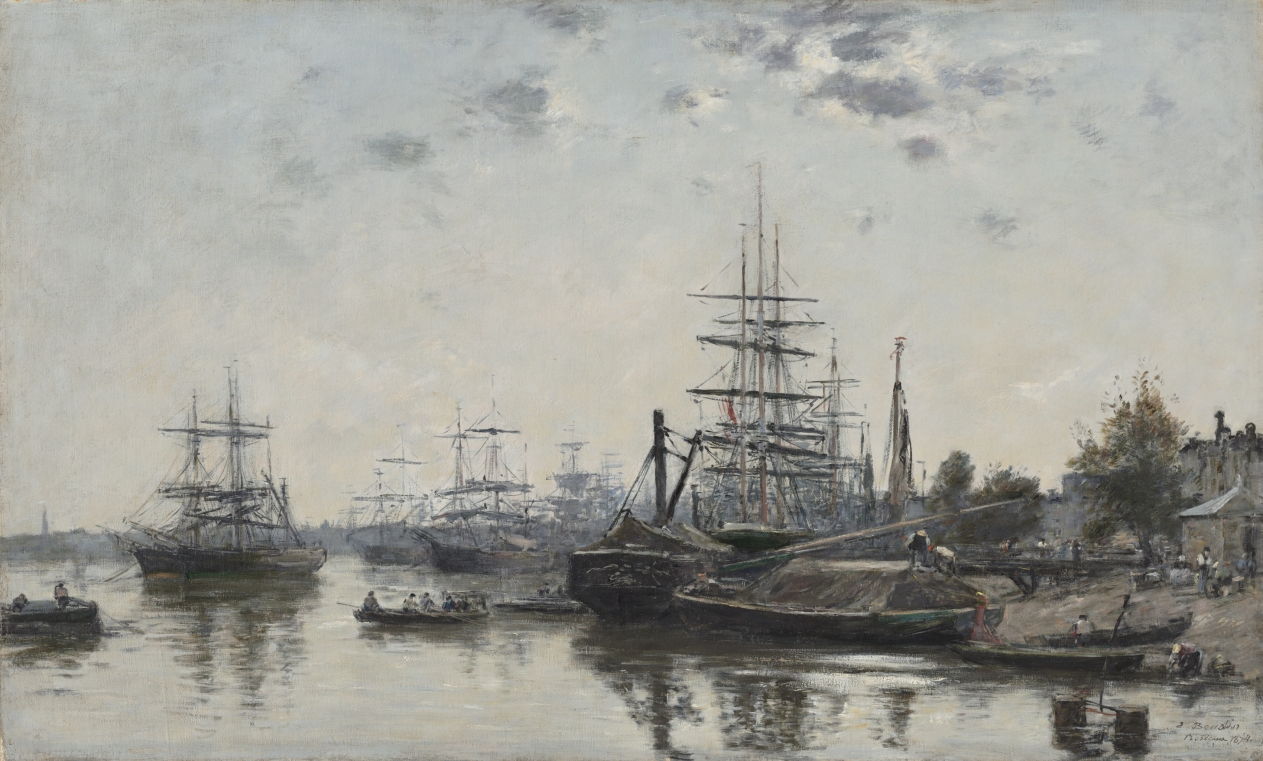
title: View of Bordeaux, from the Quai des Chartrons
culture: France, 19th century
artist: Eugène Boudin (French, 1824–1898)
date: 1874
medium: oil on fabric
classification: Painting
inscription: Signed lower right: E. Boudin / Bordeaux 1874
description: In 1873, Boudin made his first visit to the important port city of Bordeaux as a guest of the resident art collector Arthur Bourges. Between 1874 and 1876, Boudin made paintings of the city's harbor and docks. This was an especially stimulating time in Boudin's career, as he was invited to exhibit in 1874 with the newly-founded Société anonyme des artistes, soon to be known as the Impressionists. As in many of his views, Boudin concentrated here on the quais or working docks where goods were loaded and unloaded and sailors left in small dinghies for the larger vessels on which they worked. The low horizon line relegates much of the canvas to pure sky, but the soaring vertical and diagonal forms of the masts complement this horizontal thrust and open space. Many contemporaries greatly admired Boudin's ability to paint skies. Here, one can see the way in which he brushed on a tan color, then went over it, probably while it was still wet, with a thin but opaque application of white, to create a fresh, airy quality. For the darker areas representing water, Boudin laid in an olive-green tone.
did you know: Pentimenti, the visible trace of earlier painting, appears among the diagonal rigging of the small ship at the left, indicating that the artist did not thoroughly work out his composition before beginning his picture and slightly changed the position of these lines while painting.